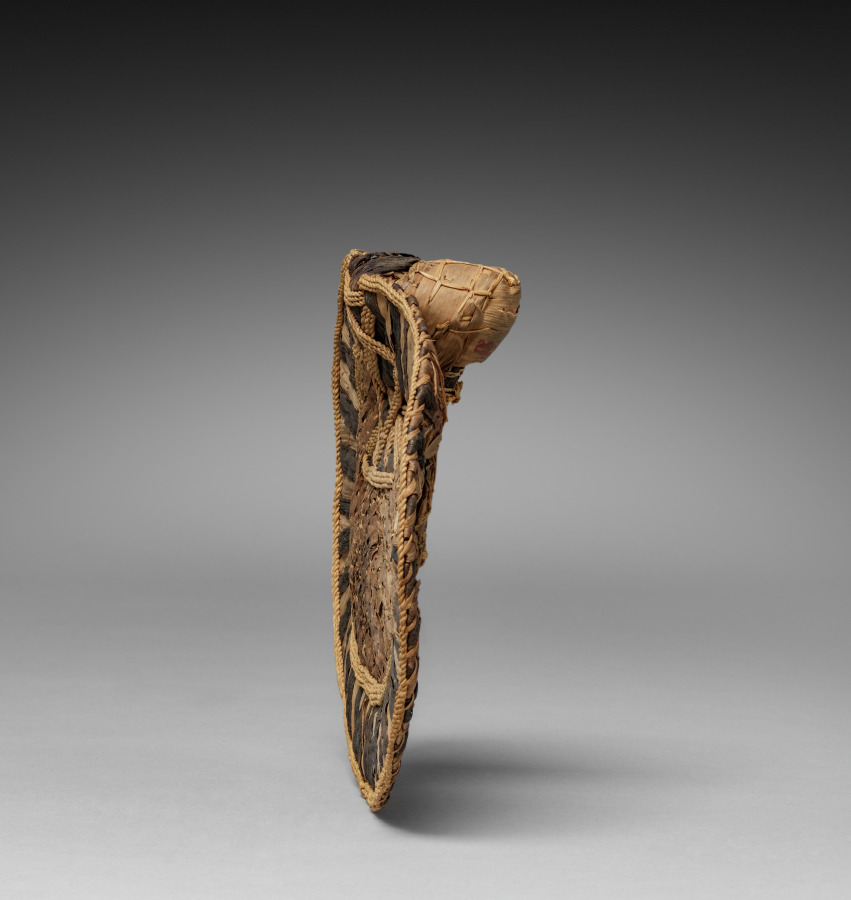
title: Back Skirt/Sitting Pad (negbe)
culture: Africa, Central Africa, Democratic Republic of Congo, Mangbetu-style makers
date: by 1928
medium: Plant fibers and dye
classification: Garment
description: Egbe (singular: negbe) were fashionable and practical garments aristocratic Mangbetu women made for special occasions. Worn over a skirt, it tied onto a girdle along with a frontal “apron.” The curved interior piece rested on the lower back. Thickly woven, flexible natural fibers bent with the body, cushioning the wearer’s behind when sitting. When the woman was standing, the decorated flat portion faced outward, showing off bold geometric motifs. Egbe were among items sold to foreigners at the Mangbetu king’s encouragement as the Mangbetu actively constructed their self image for outsiders during the 1920s and 1930s.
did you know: A curved "handle" on the negbe's interior allowed it to rest on the tailbone.